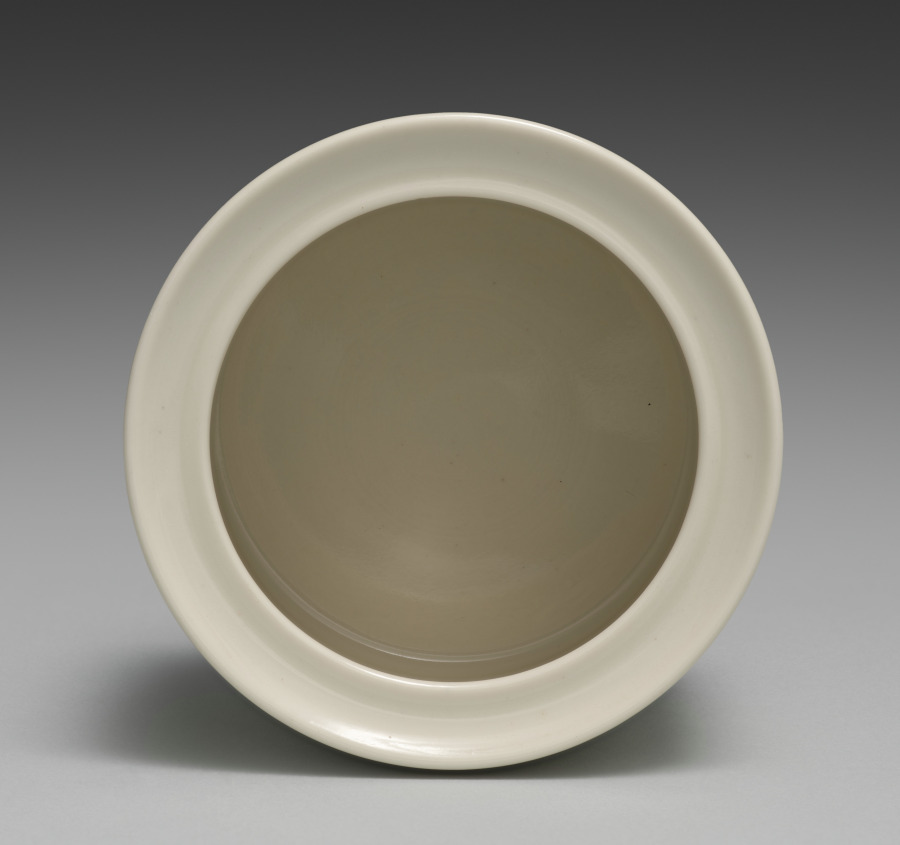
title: Incense Burner with Flowers and Dots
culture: Japan, Meiji period (1868–1912)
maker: Seifū Yohei III (Japanese, 1851–1914)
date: 1893–1914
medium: Porcelain with creamy white translucent glaze and molded and incised design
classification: Ceramic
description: Yohei III made incense burners in a wide variety of designs and styles. The body and glaze of this one are taihakuji, or “great white porcelain,” an important early invention Yohei III devised in 1872 that involved the combination of a distinctive translucent, creamy glaze over an ivory-colored clay body. The silver lid is meant to look like a single flower. The vessel has tapering legs with a combined curvilinear and geometric design; the bands encircling the middle have simple, incised flower motifs alternating with single dots.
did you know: This cylindrical incense burner has molded decorations on its creamy body.